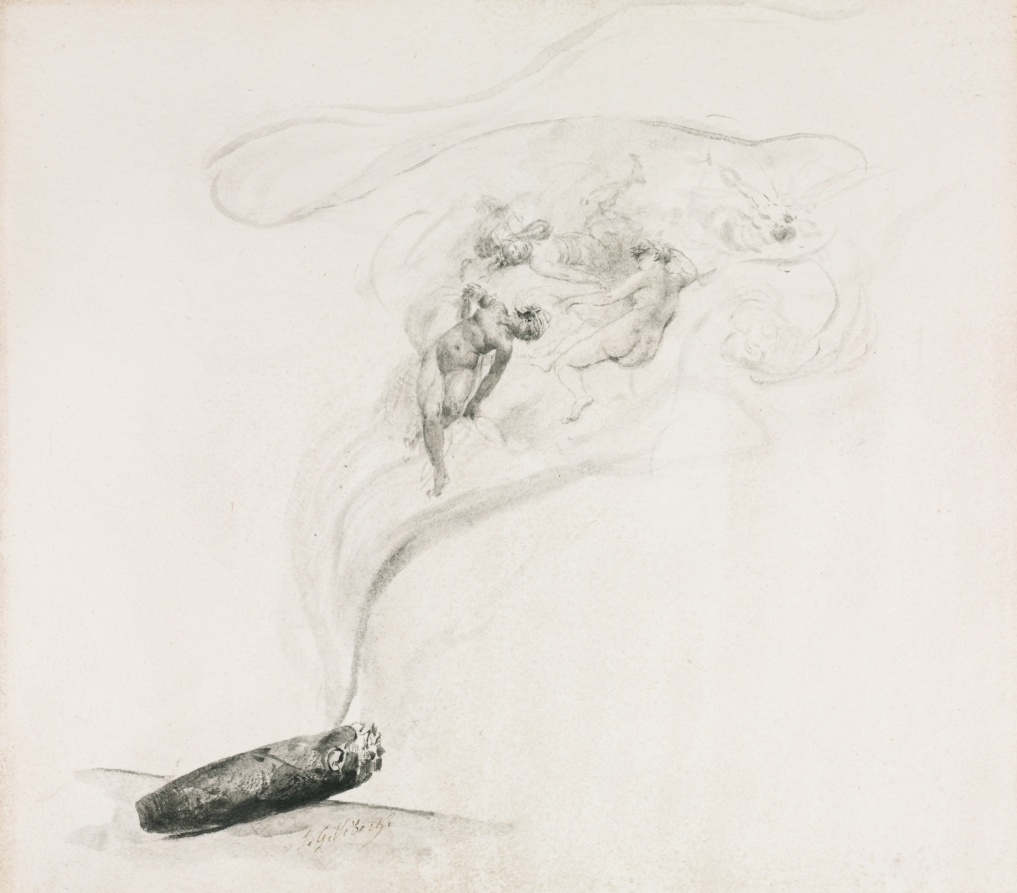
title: Dans la Fumé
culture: France, 19th century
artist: Jehan-Georges Vibert (French, 1840–1902)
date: 1800s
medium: gray wash with extensive point of brush work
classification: Drawing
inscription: Signed lower left, in brown ink, Je Ge Vibert